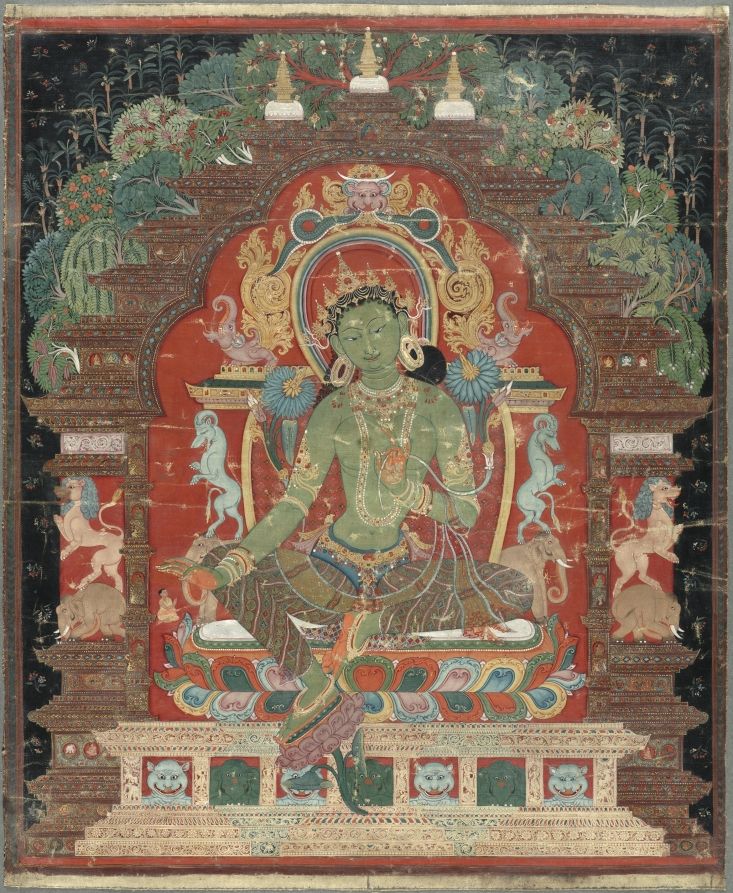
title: Green Tara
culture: Central Tibet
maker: attributed to Aniko (Nepalese, active in Tibet mid- to late 1200s)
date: c. 1260s; mounted, 2020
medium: thangka; gum tempera, ink, and gold on sized cotton; mount: silk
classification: Painting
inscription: Om Ah Hum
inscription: om tare tutare ture svaha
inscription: Om Ah Hum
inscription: Om Ah Hum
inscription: om ah sarva vyida svaha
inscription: ye dharmā hetuprabhavā he- tuṃ teṣāṃ tathāgato hy avadat teṣāṃ ca yo nirodha evaṃvādī mahāśramaṇaḥ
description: For Tibetans, Green Tara is one of the preeminent figures of their Buddhist faith, a radiant savioress who embodies the female form of the perfect, enlightened mind. The Green Tara in the Cleveland thangka—a Tibetan devotional painting on cloth—specifically dispels fear and provides protection, just like her mantra inscribed on the back side of the painting. Her green color and fear-not gesture link her to the cosmic Buddha of the North, enshrined above her head. Most scholars agree that this work was painted by the celebrated Nepalese artist known as Aniko.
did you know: The tiny monastic figure under Green Tara's right hand commissioned the painting.